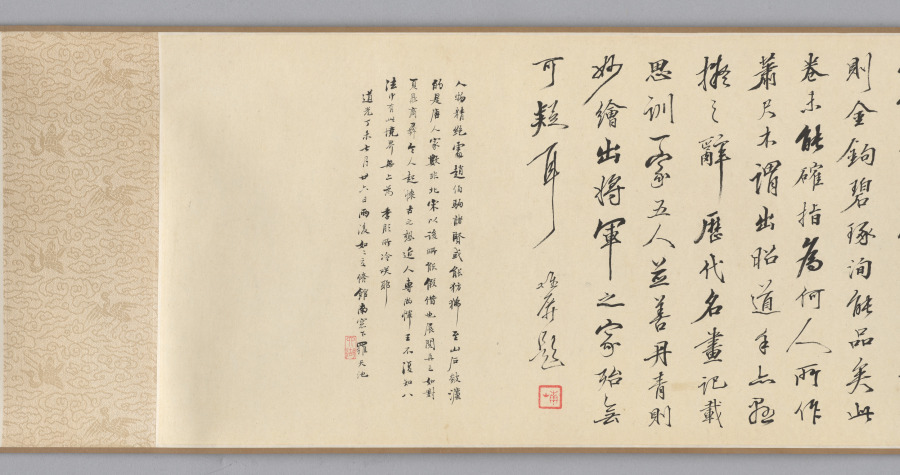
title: Waiting for the Moon in the Mid Autumn Festival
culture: China, Ming dynasty (1368–1644)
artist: Shi Rui (Chinese, c. 1400-c. 1470)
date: 1400s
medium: handscroll, ink, color, and gold on silk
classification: Painting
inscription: [印] 石氏以明; 游戯翰墨.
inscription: 僊山樓觀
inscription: 1 inscription, dated 1639, and 1 seal of Xiao Yuncong 蕭雲従 (1596-1673). Inscription by Xiao Yuncong: This is a painting by the Junior General Li. The painting is damaged and cracked at many places. Many of the paper strips for backing have been missing since long ago, but the colors are still fresh as if they had just been applied and the ink still looks moist. During the reign of Tianbao (742-756) of the Tang Dynasty, the Imperial Klansman Li Sixun was summoned to paint the walls of the Datong Hall. He was known as the "Senior General." His son, who came to be known as the "Junior General," was named Zhaodao. Of the stone epitaph [Li Sixun bei, or the "epitaph of Li Sixun," one of the best known calligraphic monuments of the Tang Dynasty], engraved with the calligraphy of Li Beihai 李北海 [Li Yong 李邕, 678-747], more than half has fallen off. Why, in contrast, was this painting able to survive? Or could it be that despite the fact that the stone is hard and the silk is soft, their preservation or destruction depends on some other factors? Moreover, since they were titled nobility of imperial descent, it is doubtful that they had the leisure and the mood to indulge in such decorative and descriptive blue and gold painting for the mere amusement of their fellow men. Recently, I read the Yi zhou ming hua lu 益州名畫錄 [by Huang Xiufu 黃休復, preface 1005]. I found a certain Li Chin-nu who compared himself with Li Zhaodao 李昭道 and was called by the Sichuan people the Junior General Li. In a painting which he did, entitled Mt. Ch'ing-ch'eng, the architectural structure of the pavilions, terraces, bridges, and boats are meticulous and accurate. The horsemen on a spring outing are as small as grain and the wild geese among the clouds as tiny as dust. It was also said that he painted on silk of any length in accordance to specific commissions. Is it possible that this painting is one of his? Since that time 700 years have passed. Yet one of the two Junior General Li's must be our painter. Formerly, there were the so-called "Four Excellents" in the Hall of Portraits of the Buddhist monk Wu-ta Kuo-shih: the [portrait] painting by Ch'ang Ts'an [act. ca. 881-888}, the calligraphy by Priest Tao-ying, the eulogy by Li Shangyin 李商隱 [813-858], and the landscape by Li Sheng [act. ca. 908-925]. This Li Sheng was styled Chin-nu and was also called Junior General Li. In the tenth month of the Chi-mao year, the twelfth year of the Chongzhen era [1639], recorded by Xiao Yuncong of Wuhu. trans. WKH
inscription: 4 colophons and 30 additional seals: 1 seal of Xu Qianxue 徐乾學 (1631-1694); 1 seal of Li Chien 黎簡 (1747-1799); 1 seal of Chang Chin-fang (18th c.); 2 seals of Sun Erzhun 孫爾準 (1770–1832); 1 colophon and 2 seals of Zhang Weiping 張維屛 (1780-1859); 1 seal of Wu Rongguang 吳榮光 (1773-1843); 1 colophon and 2 seals of Luo Tianchi 羅天池 (1826 jinshi); 7 seals of Wu Yanhui 伍元蕙 (active 1821–1851); 2 colophons and 4 seals of Pan Zhengwei 潘正煒 (1791-1850); 9 seals unidentified.